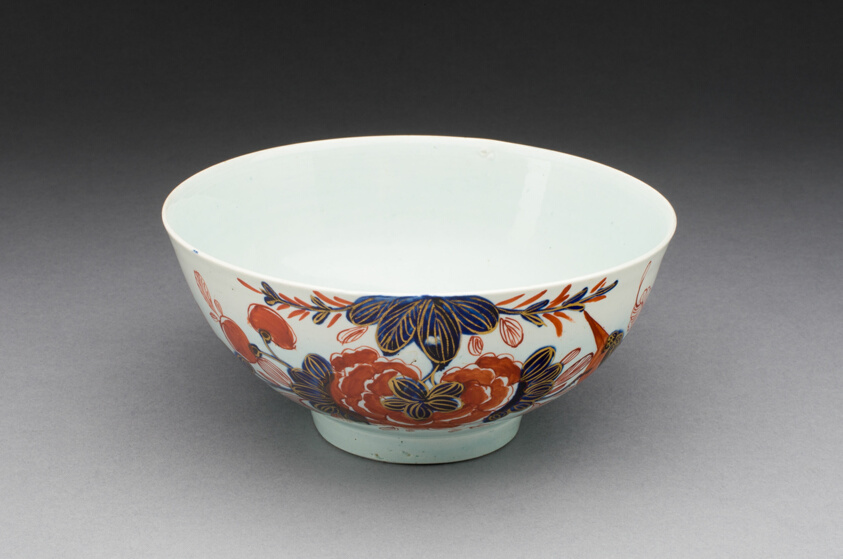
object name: Ceramics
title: Bowl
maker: Vauxhall Porcelain Factory; English, 1751-1764; England, London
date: 1760/64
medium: Soft-paste porcelain with underglaze blue, iron red, and gilding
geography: London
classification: bowl; porcelain; dish (vessel); european decorative arts; ceramics